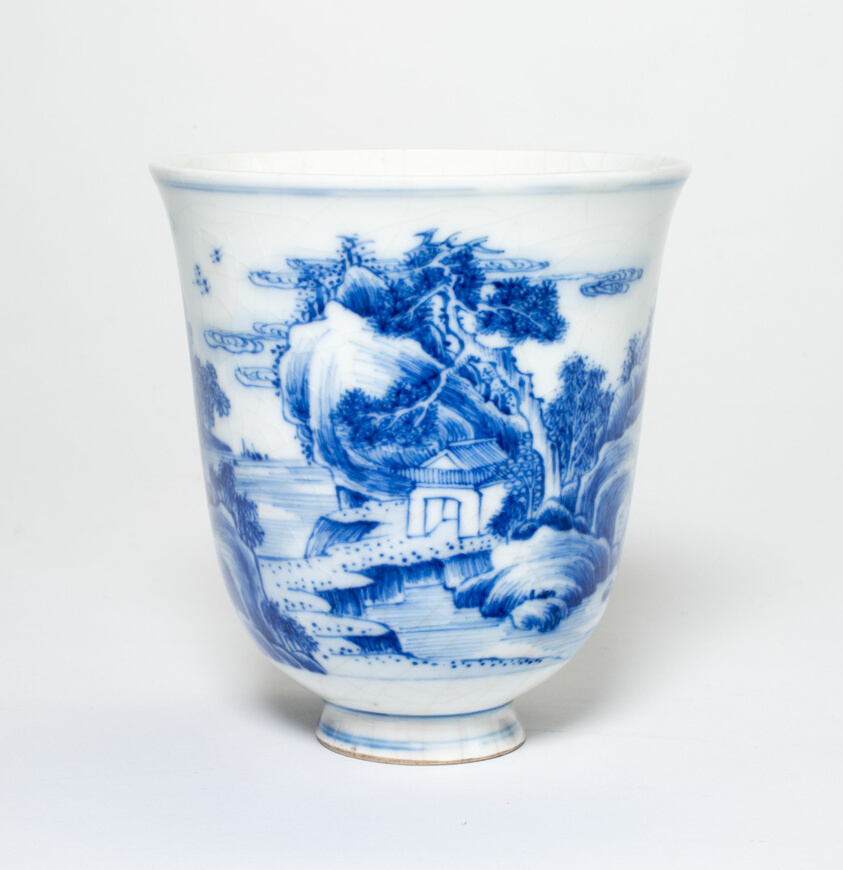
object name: Vessel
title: Flared Cup with Figures in a Mountain Landscape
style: Chinese (culture or style)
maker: China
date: Ming (1368–1644) or Qing dynasty (1644–1911), 17th/early 18th century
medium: Porcelain painted in underglaze blue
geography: China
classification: drinking vessel; porcelain; asian art; ceramics; vessel